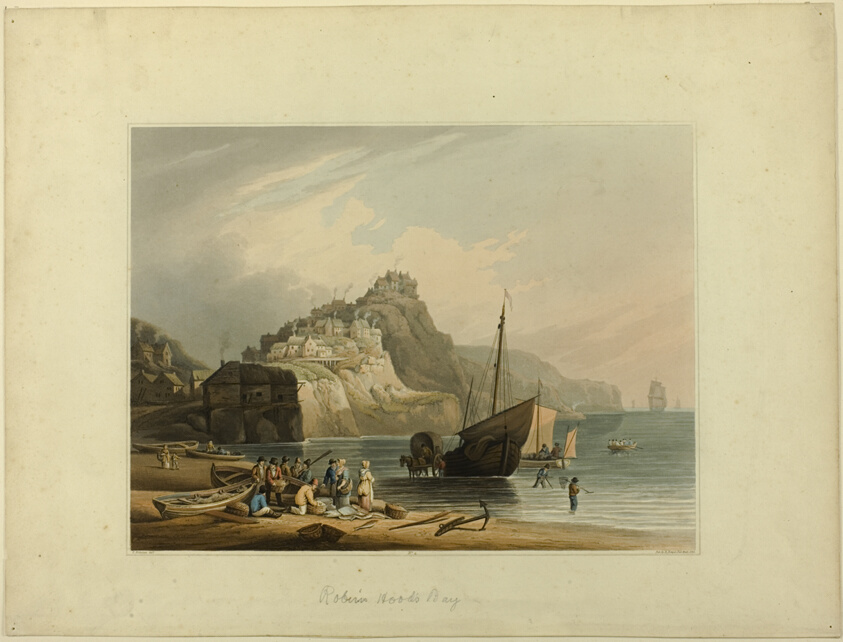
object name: Print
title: Robin Hood's Bay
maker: Francis Nicholson (English, 1753-1844)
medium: Color aquatint on paper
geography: England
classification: lithograph; print; prints and drawing